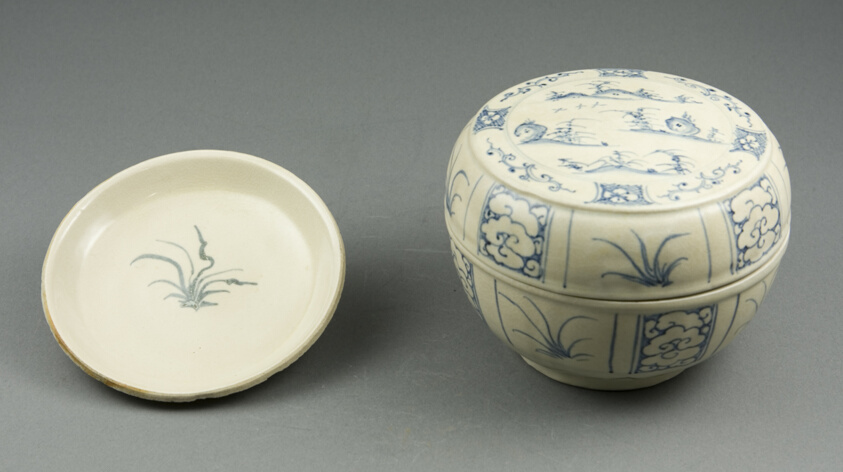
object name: Ceramics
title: Covered Box with Plant and Cloud Motif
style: Southeast Asian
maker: Vietnam; near Hoi An (offshore)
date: Late 15th/early 16th century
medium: Glazed stoneware with cobalt-blue underglaze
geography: Vietnam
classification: decorative arts; ceramics